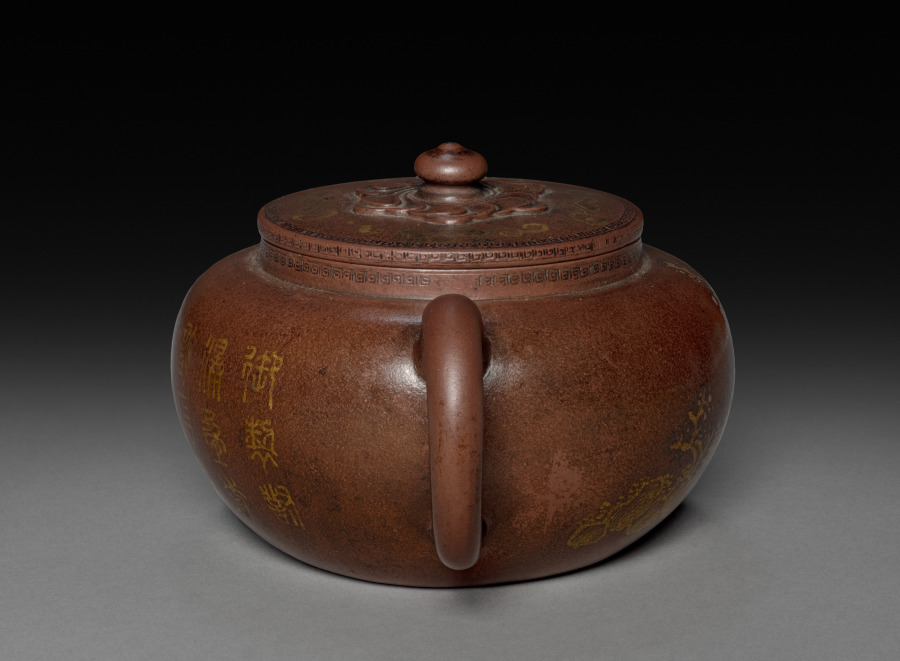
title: Teapot with Landscape and Imperial Poem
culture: China, Jiangsu province, Yixing, Qing dynasty (1644–1911), Qianlong reign (1736–95)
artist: Chen Hanwen (Chinese, active c. 1720s–90s)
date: 1762–95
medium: Stoneware, with gold pigment, Yixing ware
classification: Ceramic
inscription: 陳漢文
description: This teapot with a polished surface shows an imperial poem in gold on one side and a landscape on the other. The poem in archaic seal script was composed by the Qianlong emperor on his third southern inspection tour in 1762, when he traveled to southern China to solidify his rule. The base bears a stamped seal of its maker. Yixing potters produced teapots primarily for Ming dynasty literati-officials who valued simplicity and restraint, until the early Qing emperors introduced them at court.